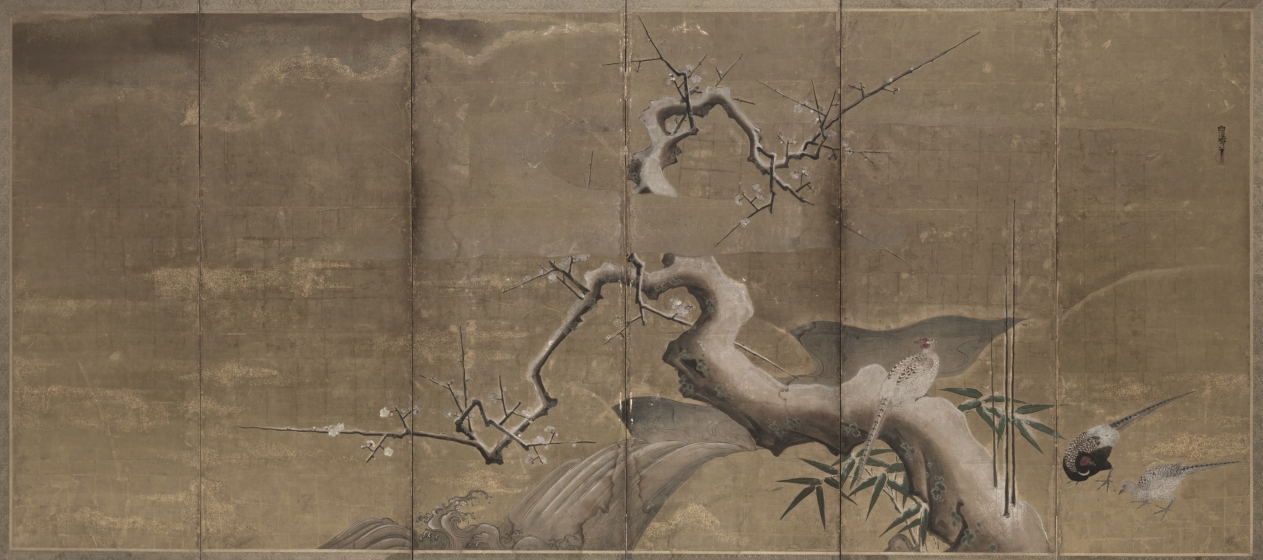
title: Winter Scene with Plum Trees and Pheasants (Birds Left)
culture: Japan, Edo period (1615–1868)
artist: Kano Naonobu (Japanese, 1607–1650)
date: early 1600s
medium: pair of six-fold screens, mineral pigments and gold leaf on paper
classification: Painting